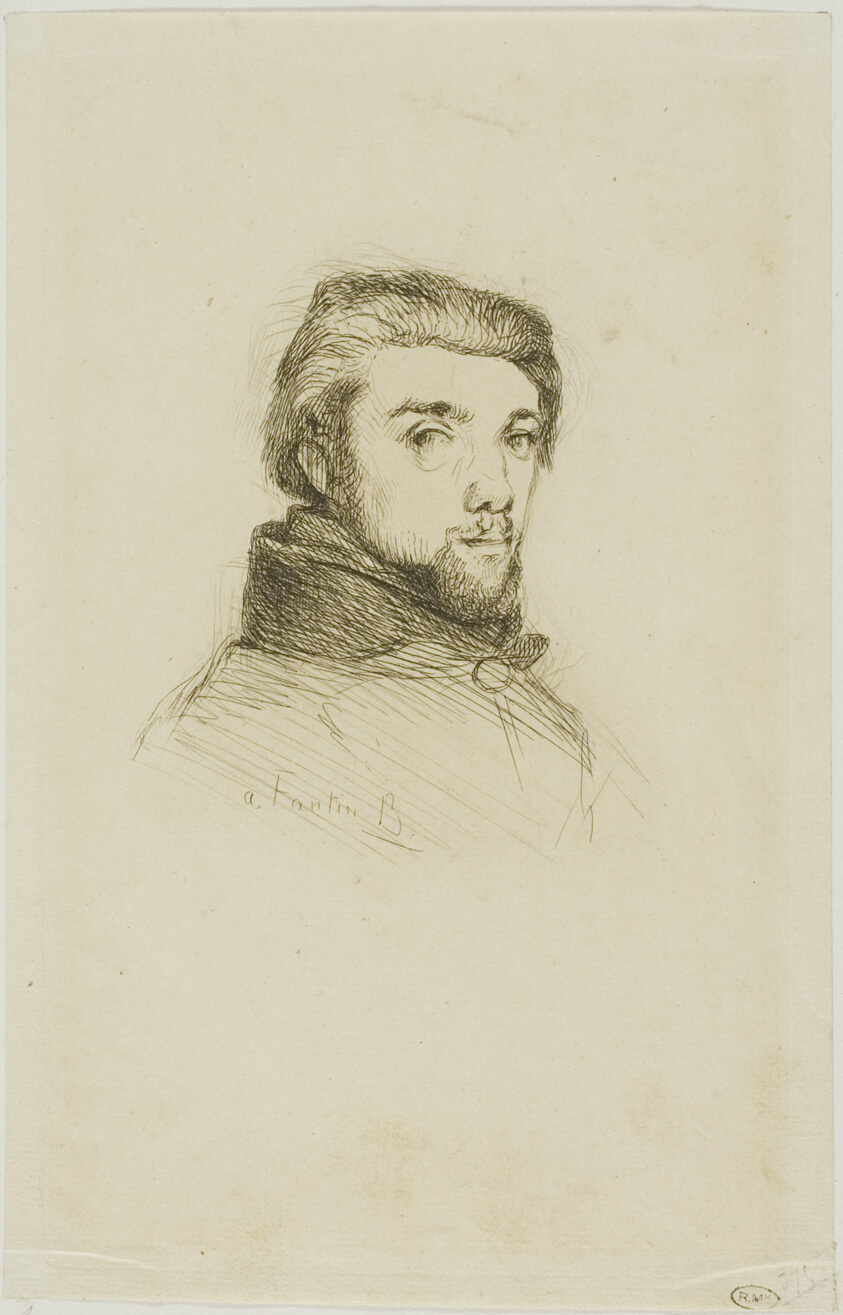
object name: Print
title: Portrait of Fantin-Latour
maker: Felix Bracquemond; French, 1833–1914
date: 1853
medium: Etching and drypoint on ivory laid paper, laid down on white wove card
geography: France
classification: lithograph; print; prints and drawing